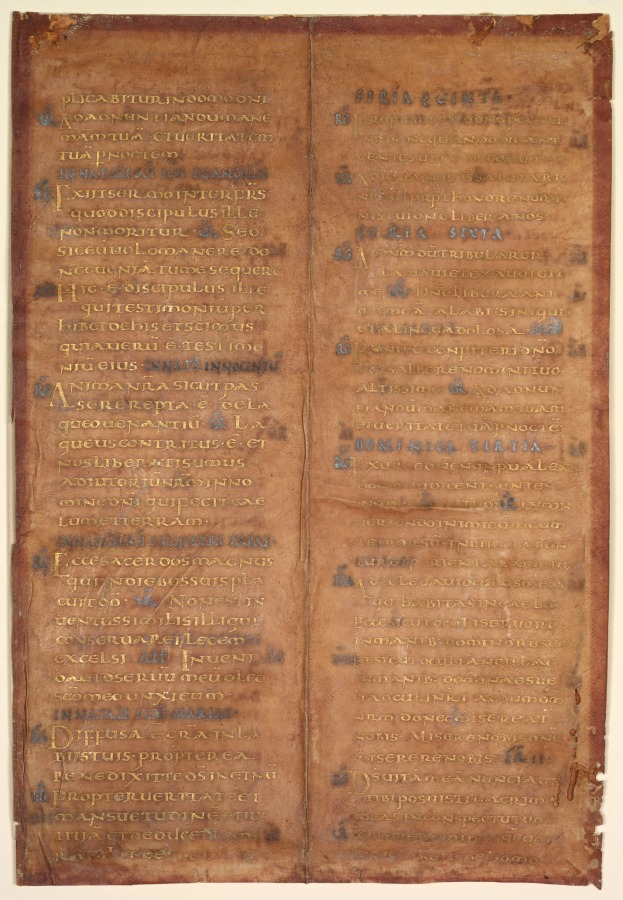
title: Bifolium Excised from a Carolingian Gradual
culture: Germany or Northeastern France, 9th century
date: c. 830–60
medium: gold and silver ink on purple parchment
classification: Manuscript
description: This rare leaf comes from a cantatorium or gradual, a book containing the chants to be sung during the Mass. Other leaves from the same book survive in Berlin and Trier. As a bifolium, or double-leaf, it does not contain decorated letters but rather "emphasized" letters. These were enlarged and pushed out into the margins to catch the reader's eye. Such emphasized letters originated in late classical times and were the precursor to the decorated initial developed by medieval scribes. The purple-stained vellum (now faded to a deep pink) with its text written in gold and silver inks (now turned black) suggested great luxury with its sumptuous appearance. In Mediterranean regions, the purple dye was obtained from murex, a shellfish dye. In northern Europe, plant dyes were used as an alternative. Combined with the use of gold and silver ink a spectacular appearance was achieved that is traceable back to classical antiquity.